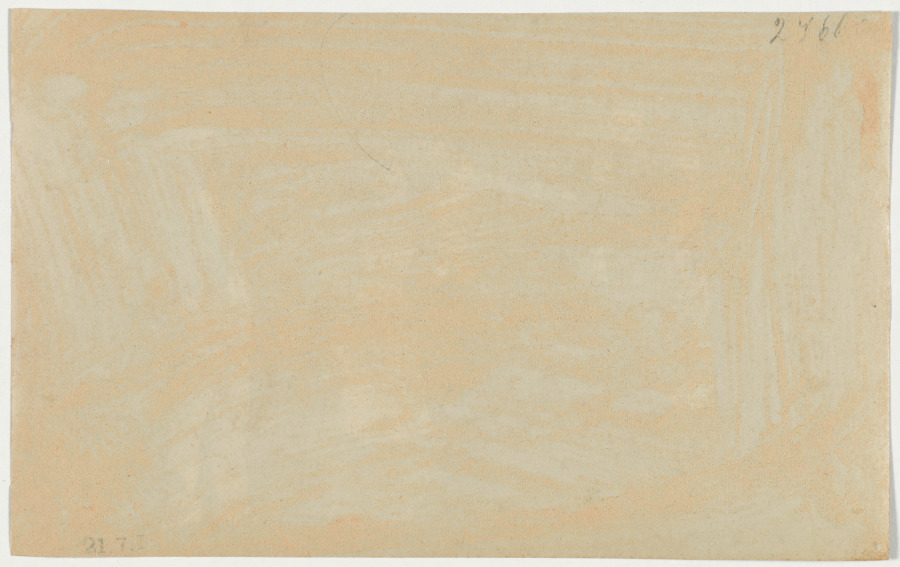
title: Fancy Group, Indore II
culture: India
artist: Raja Deen Dayal (Indian, 1844–1905)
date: 1886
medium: albumen print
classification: Photograph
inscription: Stamped in black ink on verso: “31.7I” Written in pencil on verso: “2466”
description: Entertainments at “fancy dress” or costume parties often included amateur theatricals or tableaux vivants—static scenes drawn from literature, history, or artworks. Here, Deen Dayal captured three moments distilled from a popular novel or play. The guests—all middle or upper class—perform as characters ranging from the working class to ladies and gentlemen. Because the photographic technology of the time required strong daylight, the photographs would have been made on a separate occasion, not at the party.